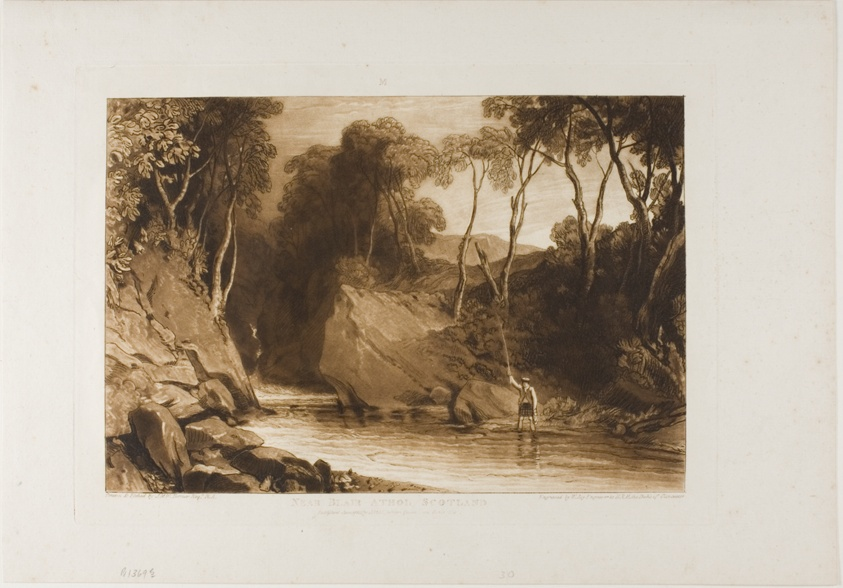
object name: Print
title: Near Blair Athol, plate 30 from Liber Studiorum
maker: Joseph Mallord William Turner (English, 1775-1851); Engraved by William Say (English, 1768-1834)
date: published June 1, 1811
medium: Etching and engraving on ivory wove paper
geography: England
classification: etching; print; prints and drawing